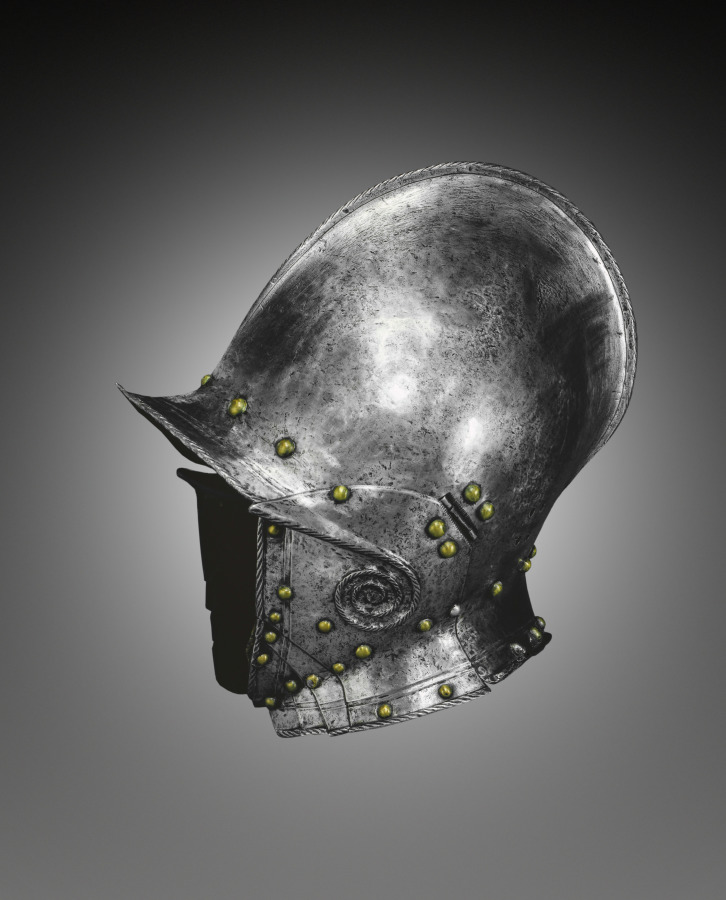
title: Burgonet with Hinged Cheek Pieces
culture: North Italy, 16th century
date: c. 1560–70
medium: steel with brass rivets, roped edges terminating in decorative spiral; fragments of leather liner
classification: Arms and Armor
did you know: This helmet once had a leather liner to protect a soldier's head from the hard steel. Armorers continuously innovated their designs, keeping in mind both protection and comfort.